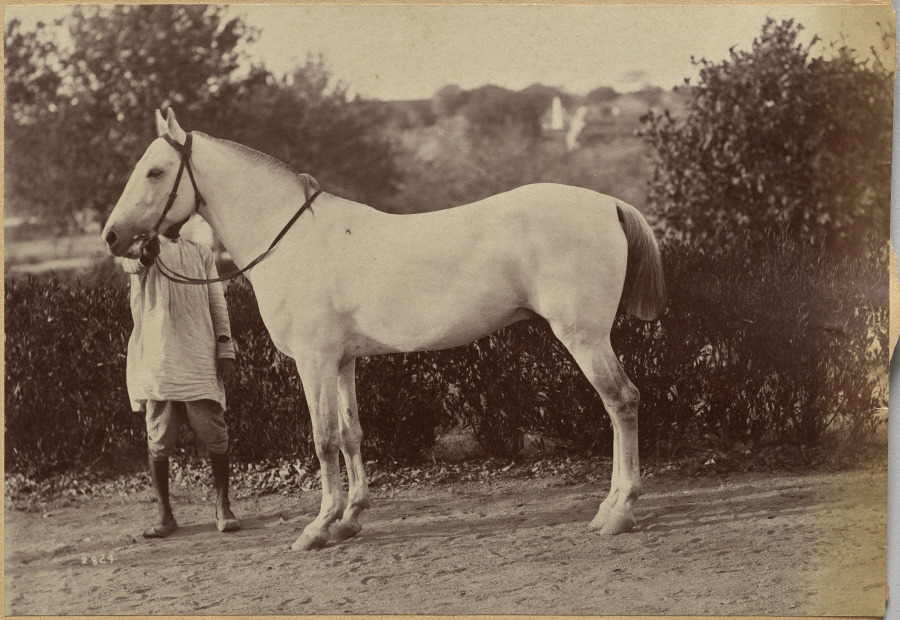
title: Captain Bailward's horse, Jhansi (verso, right)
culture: India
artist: Raja Deen Dayal (Indian, 1844–1905)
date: c. 1882–87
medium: albumen print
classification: Photograph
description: These photographs are part of an album, now disassembled, of around 105 photographs taken in India between 1885 and summer 1887 that provide glimpses into the lives of the British colonial elite and royal and upper-class Indians. The museum holds another group of 37 pictures from this album (2016.266), which was probably commissioned by a British civil servant visiting or working in India around 1888 as a personal souvenir of his experiences there.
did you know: Raja Deen Dayal is regarded now, and was considered during his lifetime, to be India’s most important 19th-century photographer.